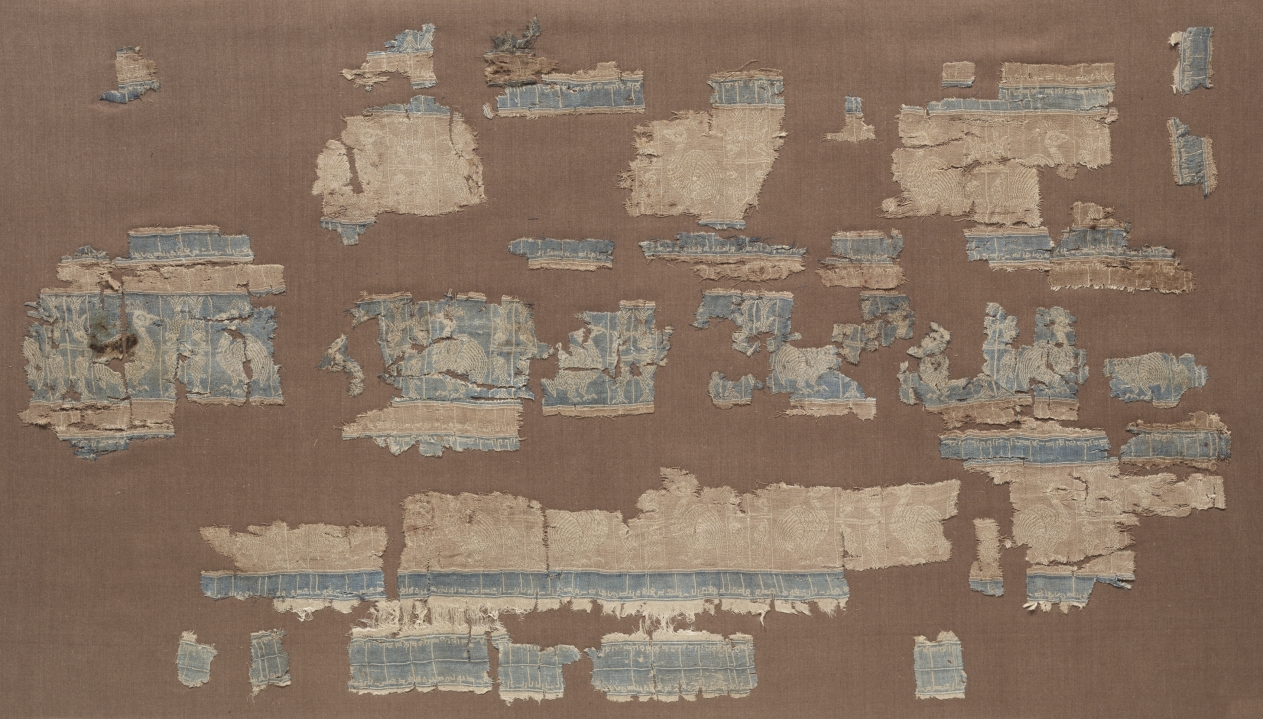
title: Fragment (of a Shroud?) with Inscription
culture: Iran or Iraq, in the style of the Abbasid period (750–1258)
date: before 1982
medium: Silk: lampas weave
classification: Textile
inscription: Ya rabb in 'azumat dhunubi kirbrat an fa-laqad 'alimtu bi-anna 'afwada a'zam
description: This fragment, which possibly was part of a shroud, has wide horizontal bands of birds and fish alternating with narrow double bands of inscription. The text reads in both orthograde and retrograde: "Oh Lord! Even though my sins may be very great, I know that Thy forgiveness is greater." Bands are alternately blue and tan with design in white. A portion of selvage is preserved at right and a starting edge at bottom.